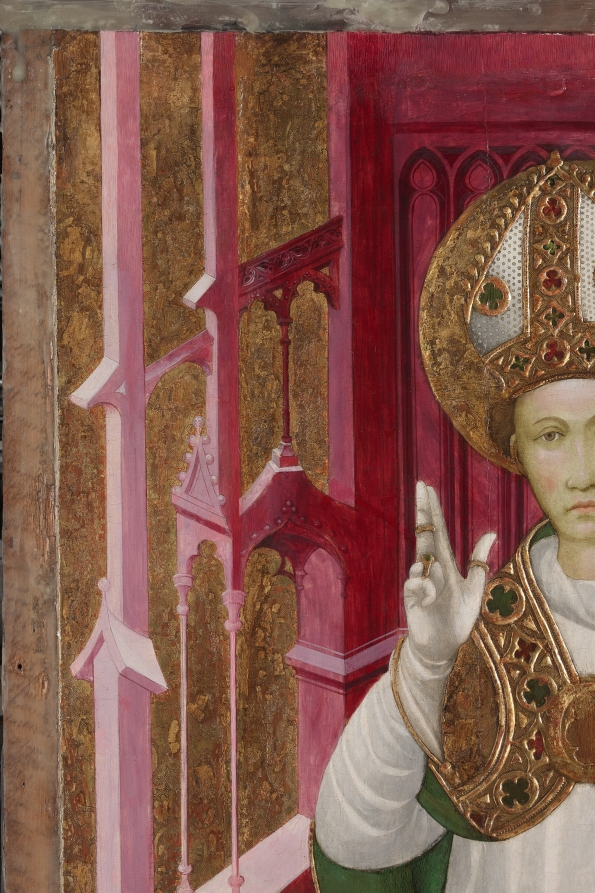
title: A Bishop Saint with a Donor (Saint Louis of Toulouse?)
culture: Spain, Catalonia, early 15th century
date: early 1400s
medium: tempera with raised and gilded gesso on wood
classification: Painting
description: The style of this painting suggests that it comes from Catalonia in northeastern Spain, though the identity of its artist remains unknown. The painting represents a youthful bishop-saint identifiable by a bishop’s symbols of authority, his miter and crozier. He wears rich vestments. Below, the figure in black represents the donor of the painting—likely a wealthy layperson rather than a cleric. The identity of the saintly bishop is speculated to be Saint Louis, Bishop of Toulouse, on the basis of his youth. Louis was consecrated Bishop of Toulouse in 1297, died six months later at the age of 23, and was canonized in 1317. His relics were moved in 1423 to Valencia and his cult flourished in Spain.